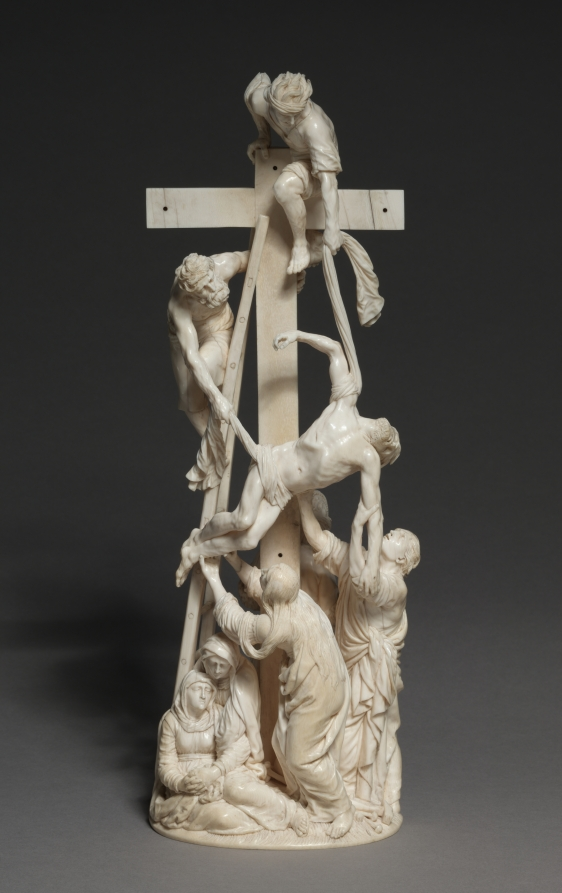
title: Descent from the Cross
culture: Austria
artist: Adam Lenckhardt (German, 1610–1661)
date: 1653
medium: ivory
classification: Sculpture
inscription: inscribed with monogram "AL" conjoined and dated 1653.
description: Carved from a single piece of ivory for Prince Karl Eusebius von Liechtenstein of Vienna, this work is a true tour-de-force. It took Lenckhardt seven years to complete; it is his last known sculpture and the pinnacle of his career. The biblical accounts of the descent from the cross found in the gospels are not consistent, which may contribute to the difficulty in precisely identifying the figures. The Virgin Mary, Saint John, Mary Magdalene, and others were said to be present, but undoubtedly there are other disciples here mourning Christ’s death. The intense emotion registers on the faces of the figures in the scrupulous and exquisitely detailed work.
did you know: Carved from a single elephant tusk, the artist took special care to ensure the ivory did not crack or break as he meticulously crafted each figure in this visually exciting sculpture. Look closely to find tools and small objects included near its base.